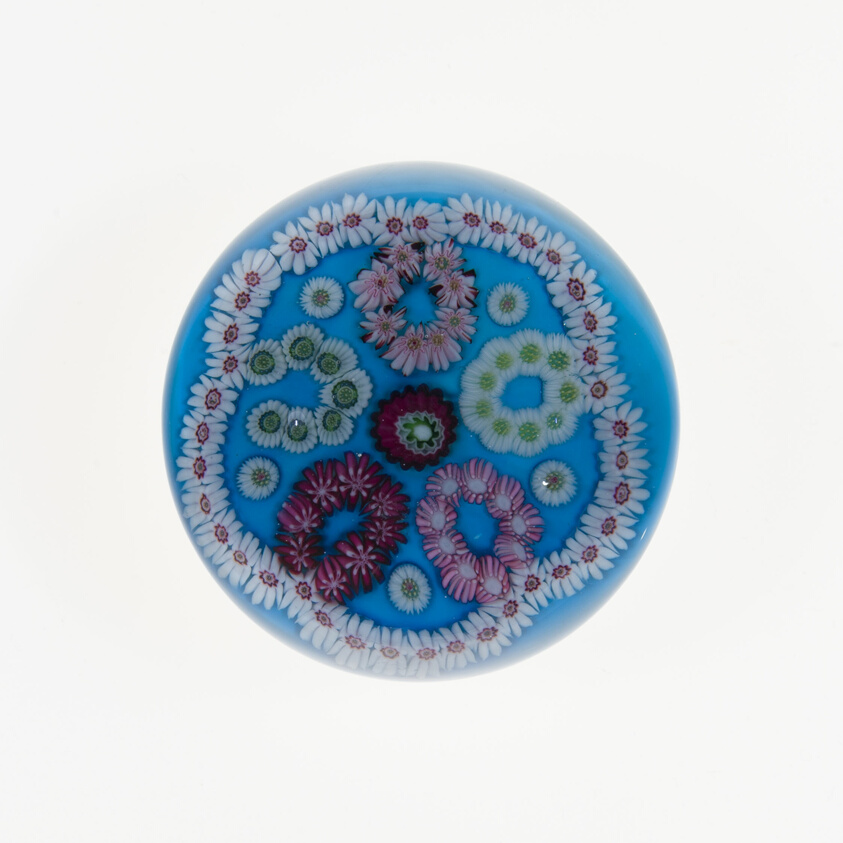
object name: Glass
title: Paperweight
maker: Clichy Glassworks (Cristalleries de Clichy); Clichy, France, 1837-1885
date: c. 1845/60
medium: Glass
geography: France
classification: paperweight; glass